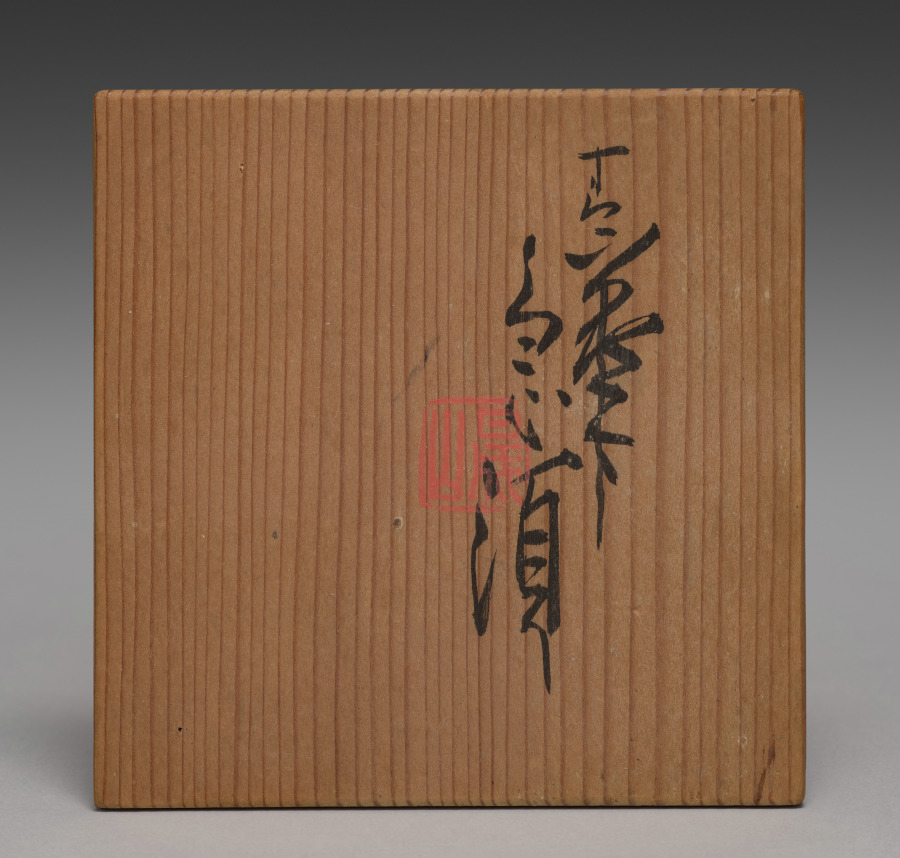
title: Teapot with Pines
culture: Japan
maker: Seifū Yohei III (Japanese, 1851–1914)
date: 1893–1914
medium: Porcelain with underglaze blue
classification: Ceramic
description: Side-handled teapots known as kyūsu and hot water coolers, or yuzamashi, are essential components of sencha tea sets. The teapot is, of course, meant for steeping and serving the tea. Yuzamashi are used to cool boiled water to the ideal temperature for the type of tea to be brewed. This teapot has a pine in underglaze blue on each side. The tip of one of these pines reaches onto the tiny lid, and as with the trees on the Water Cooler with Pines, CMA 2022.163, the trunks are curvy ribbons with little definition. Considering the execution of the two vessels' designs, one might imagine the pot and cooler to have been part of the same set.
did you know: This teapot with images of pines are among Seifū Yohei III’s designs painted in blue.